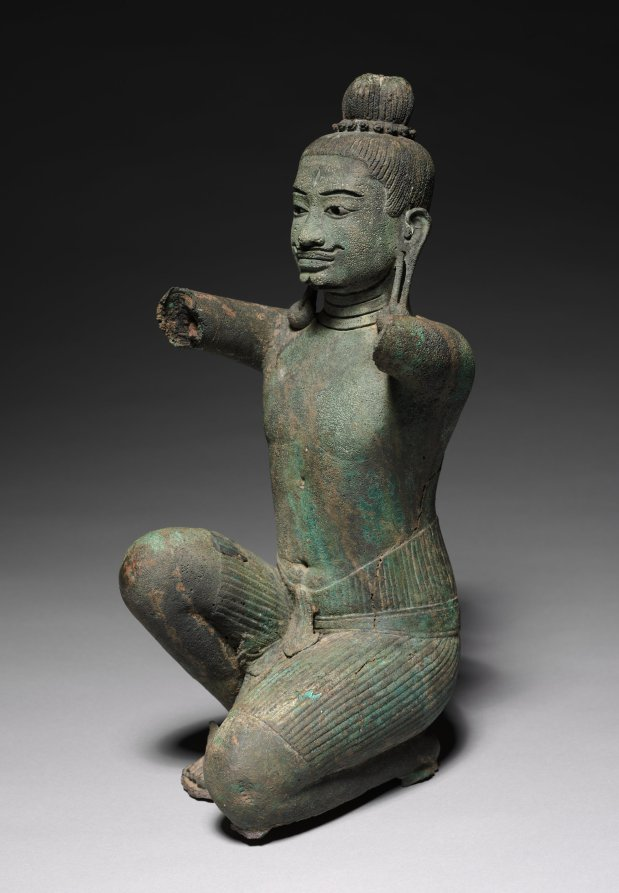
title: Kneeling Male Figure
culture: Cambodia, Angkor, Baphuon, Baphuon period, 1000s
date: 1010–80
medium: bronze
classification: Sculpture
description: The third eye in the forehead indicates that this figure identified himself with Shiva, but his kneeling stance with hands raised in a gesture of adoration indicates that he is a devotee of Shiva, who has taken on aspects of the god's physical appearance. The style of the lower garment with the low-slung belt is typical of work from the so-called Baphuon period of Khmer sculpture, like the stone standing image to the left. The eyes, eyebrows, moustache, and beard were once inlaid with silver.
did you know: This bronze figure was cast using the lost-wax (cire perdu) technique with the core armature inside.